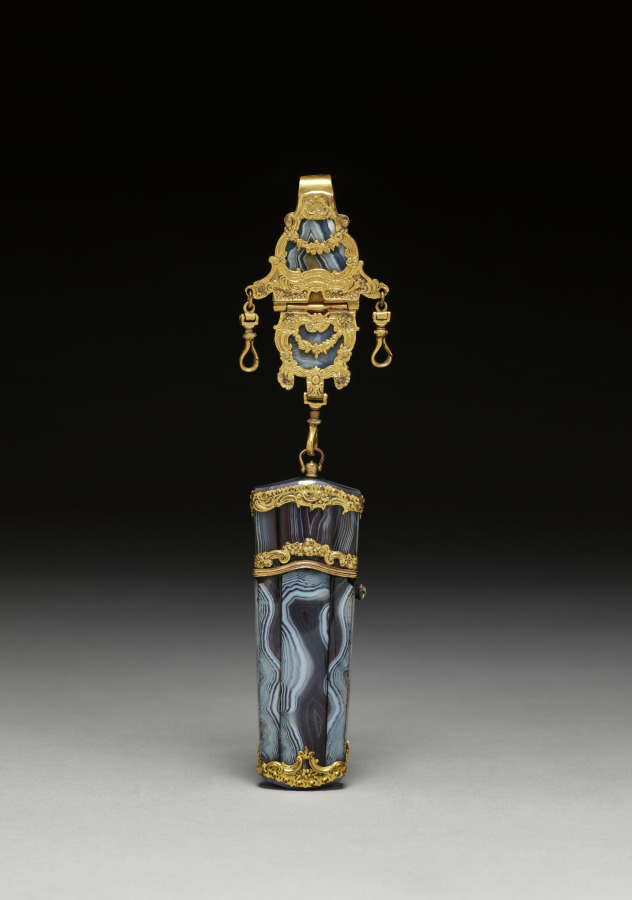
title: Chatelaine and Case (Étui)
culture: England, 18th century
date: c. 1770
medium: gray agate mounted in gilt metal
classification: Miscellaneous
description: Luxurious personal objects were an essential part of a privileged wardrobe during the 1700s and early 1800s, emphasizing their owner’s refinement and wealth. Especially popular were étuis, small ornamented cases containing miniature sewing, writing, or grooming implements that hung at a woman’s waist from an ornate clasp, known as a chatelaine. Despite its glittering surface, this small expensive set disguised a system based on the labor and suffering of enslaved or indentured people, whether in gold and stone mines or the shop where it was made.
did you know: Stored inside this case are grooming and writing instruments such as a clasp knife, scissors, an ivory tablet, a pencil, a threading needle used for lacing corsets, and an ear scoop.